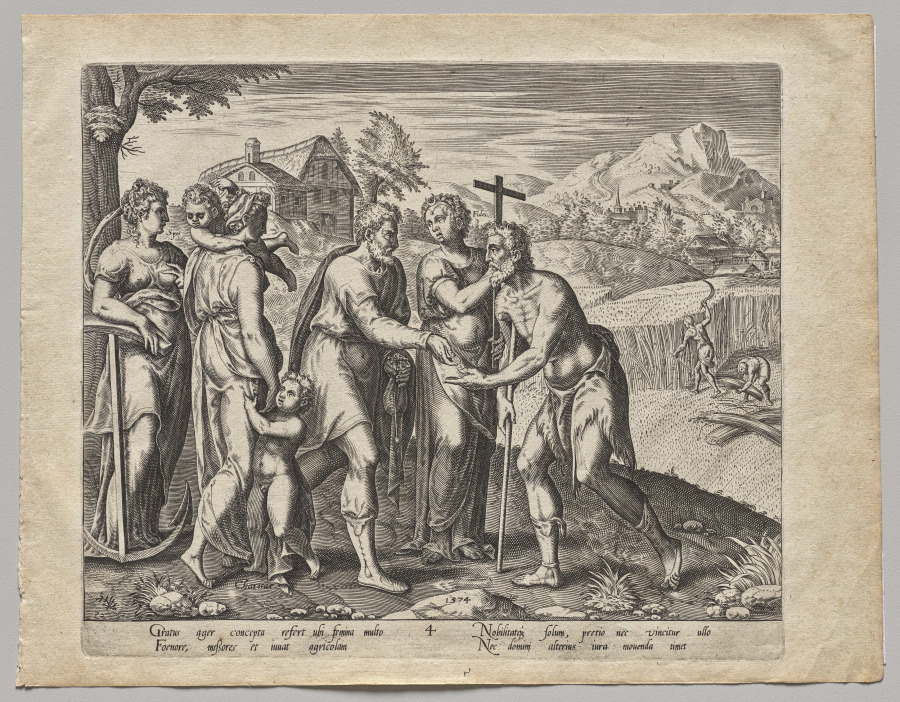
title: The Seed finding Good Earth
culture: Netherlands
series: Parable of the Sower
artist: Philip Galle (Flemish, 1537–1612)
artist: after Gerard van Groeningen (Flemish)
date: 1574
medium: engraving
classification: Print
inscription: Watermark not identified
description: This is one of a series of four prints portraying the biblical parable of the sower, made in Antwerp (in present-day Belgium) at the end of the 1500s. The parable compares types of soil to people in the world: one hardened; one fickle; one distracted by things of the world; and one with an open heart, ready to accept God. The last sower, depicted here, presents fertile soil for his seed resulting in the bountiful harvest seen in the background. He is accompanied by figures representing theological virtues Faith, Hope, and Charity.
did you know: The sower’s prosperity due to his fertile land and heart is represented by his act of charity, providing money to a passing beggar.